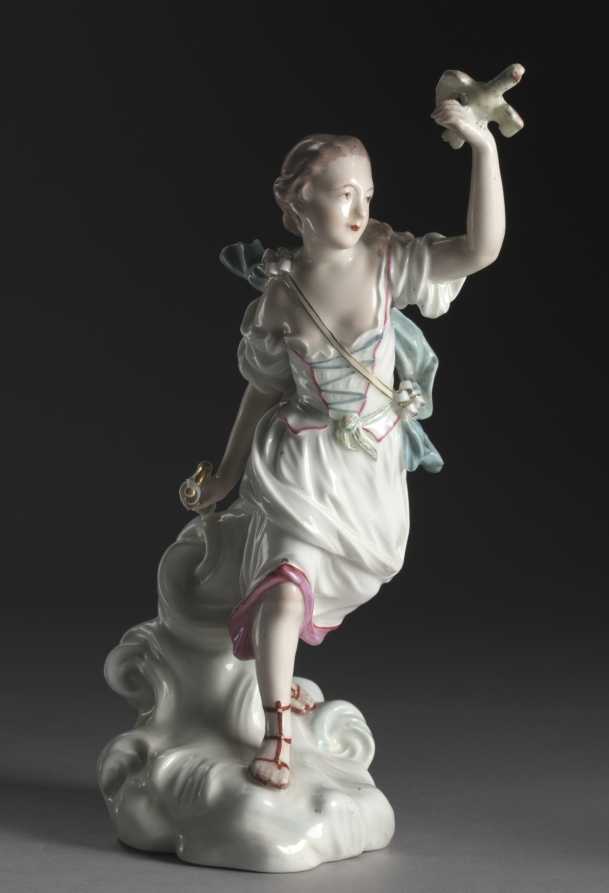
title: Air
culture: England, Derby, 18th century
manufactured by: Derby Porcelain Factory (Chelsea-Derby Period, 1770–84)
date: c. 1775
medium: soft- paste porcelain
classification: Ceramic